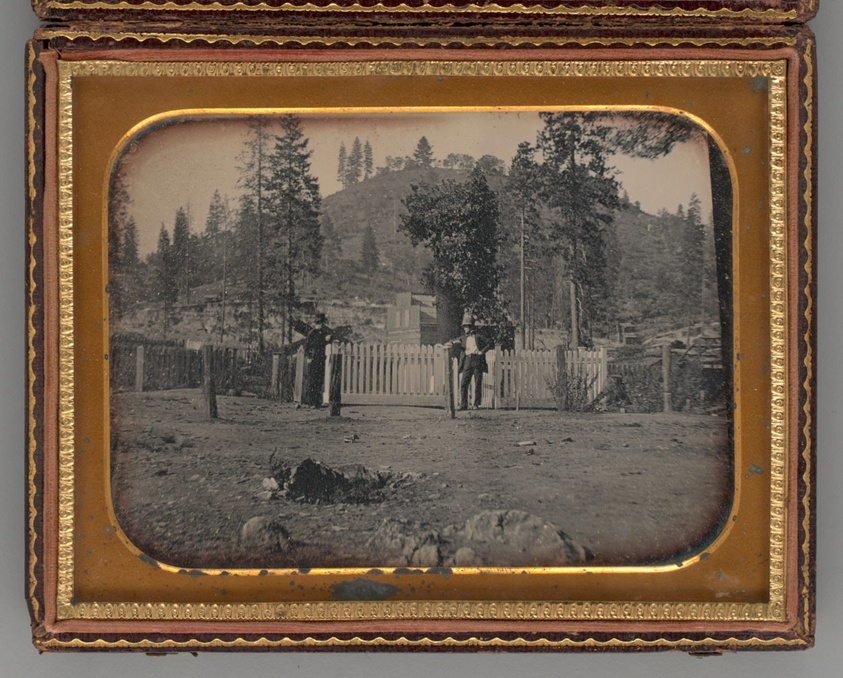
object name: Photograph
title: Untitled (Two Men Wearing Top Hats, Leaning on a White Picket Fence)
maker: William J. Shew (American, 1820–1903)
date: 1853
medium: Daguerreotype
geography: United States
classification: portrait; daguerreotype; portrait; photograph; photographic process; photography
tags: lundberg collection, gold mining, gold rush, people